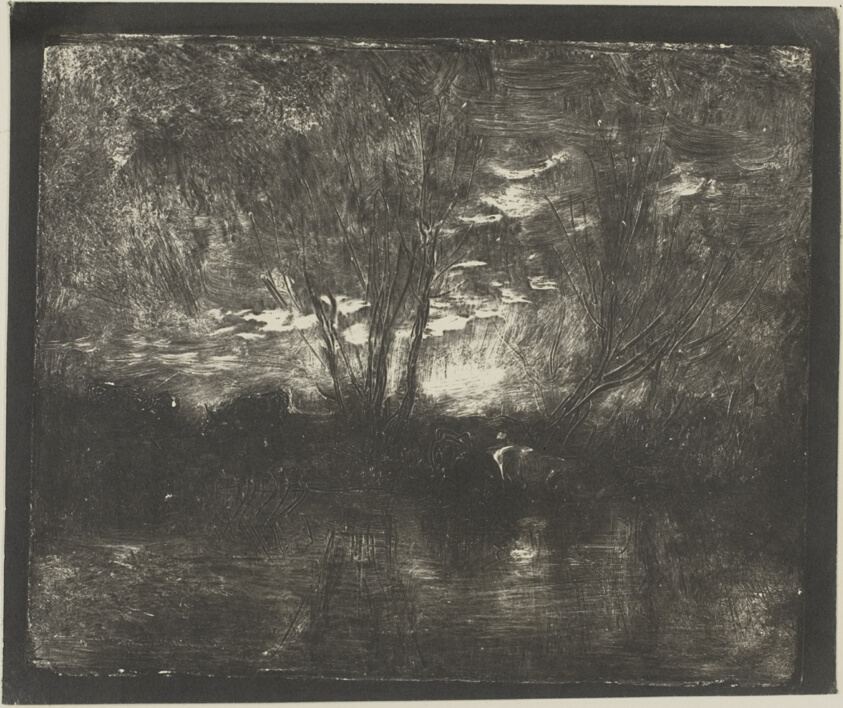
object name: Print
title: Cows at the Watering Place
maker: Charles François Daubigny (French, 1817-1878)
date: 1862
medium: Cliché-verre on ivory photographic paper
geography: France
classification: cliché-verre; print; prints and drawing